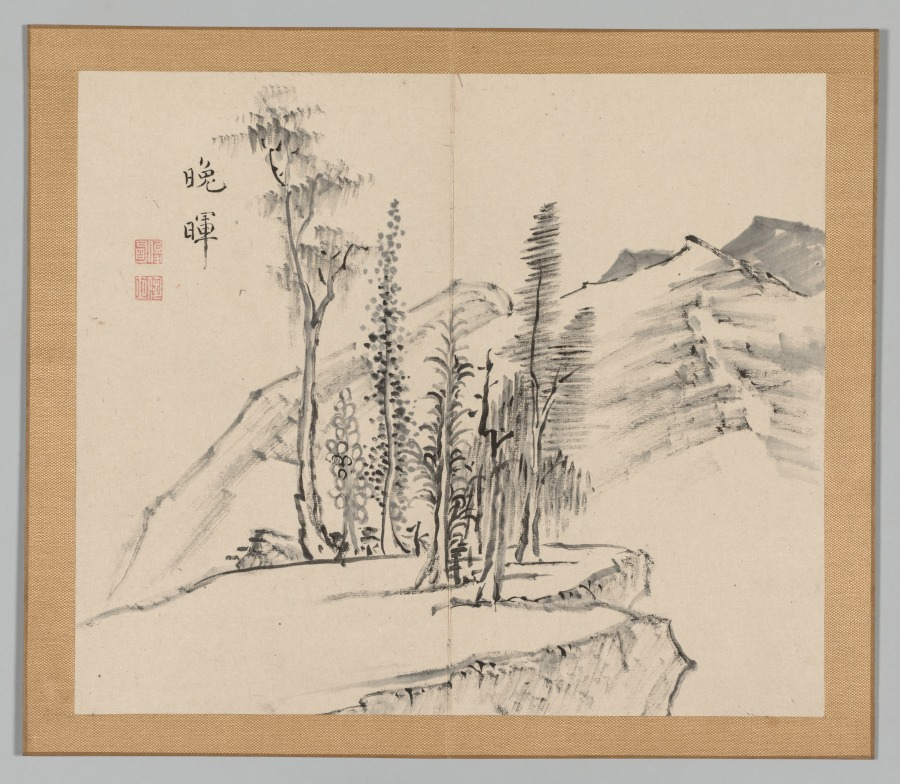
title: Reverberations of Taiga, Volume 2 (leaf 21)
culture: Japan, Edo period (1615–1868)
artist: Aoki Shukuya (Japanese, d. 1802)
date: mid- to late 1700s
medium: double-leaf from a pair of albums; ink and light color on paper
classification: Portfolio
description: Traditionally, young painters in Japan began their studies with an established master-painter. The master's compositions invariably became models that the apprentice copied to learn various ink and brush techniques. Shukuya was a pupil of the famous Kyoto artist Ikeno Taiga, whose style is reflected in these sketches of rocks, trees, and mountains.